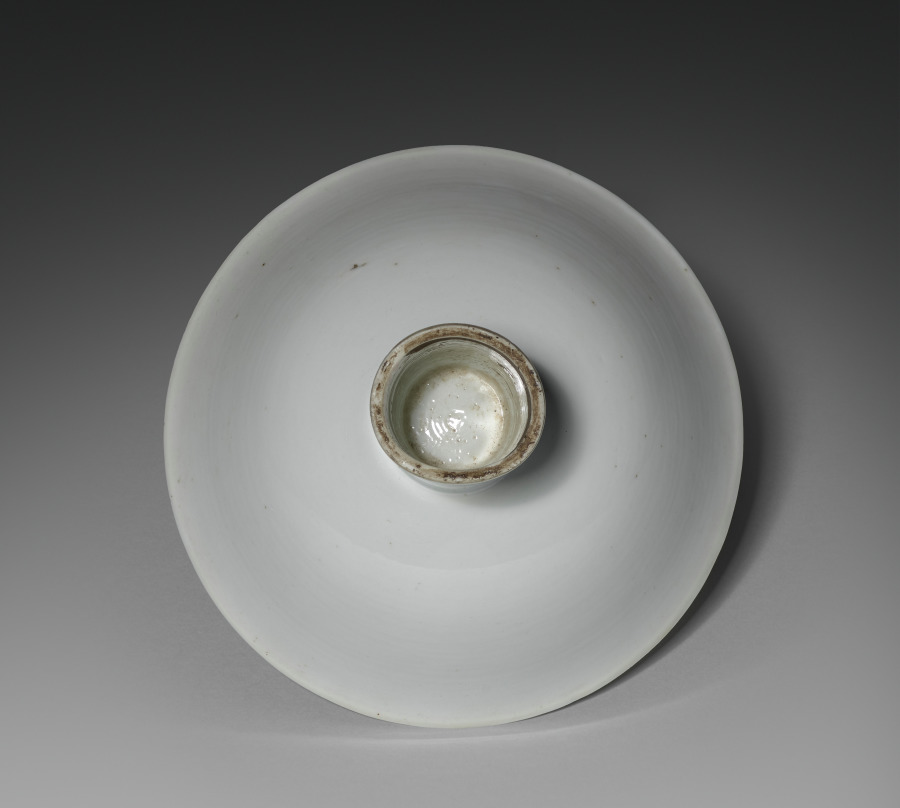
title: Stem Cup with Buddhist Emblems: Shufu Ware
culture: China, Jiangxi province, Yuan dynasty (1271-1368)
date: 1300s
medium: porcelain with molded decoration and white glaze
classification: Ceramic